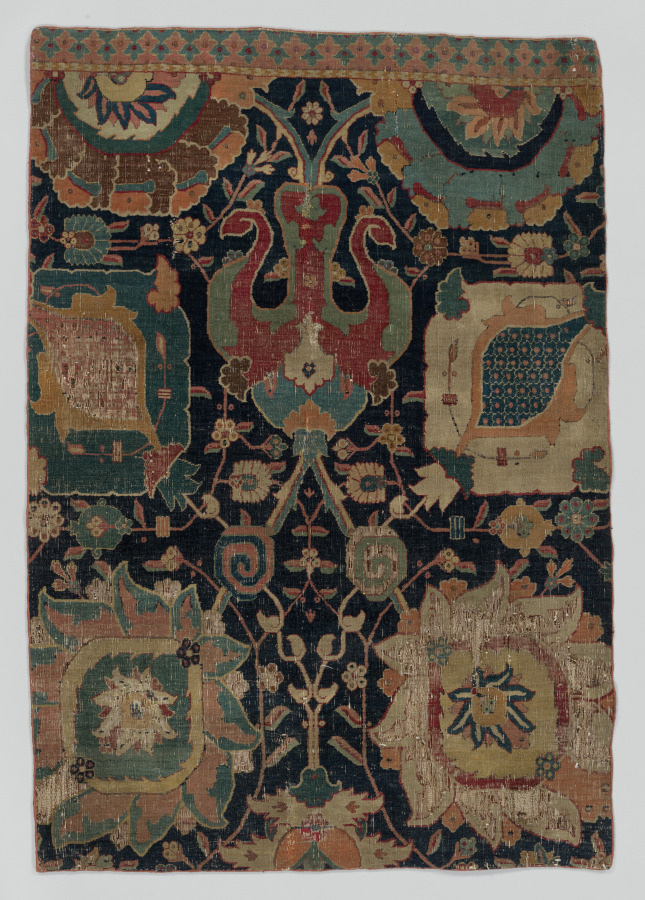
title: Carpet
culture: Iran, Kerman, 17th century (probably)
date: 17th century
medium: senna knot: wool and cotton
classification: Carpet